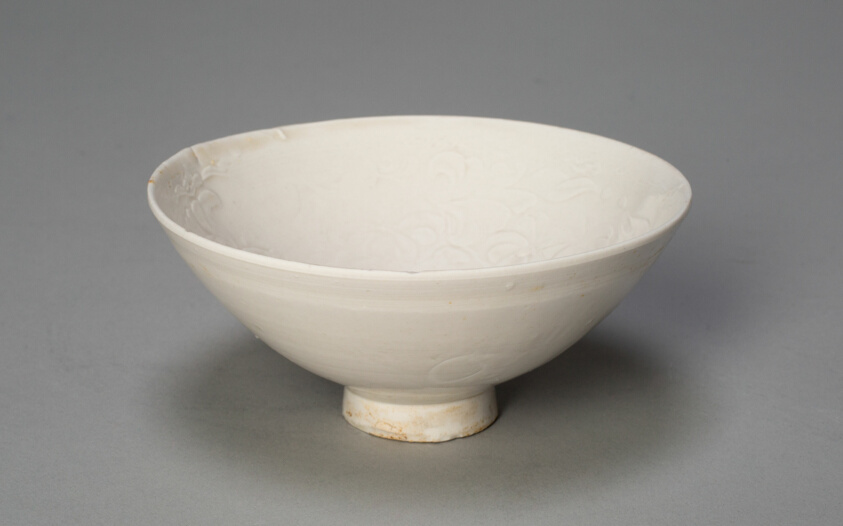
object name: Vessel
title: Conical Bowl with Peonies and Leaves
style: ding, Chinese (culture or style), East Asian, asian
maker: China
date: Song dynasty (960–1279)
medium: Ding ware; porcelain with underglaze mold-impressed decoration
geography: China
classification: porcelain; asian art; ceramics; vessel